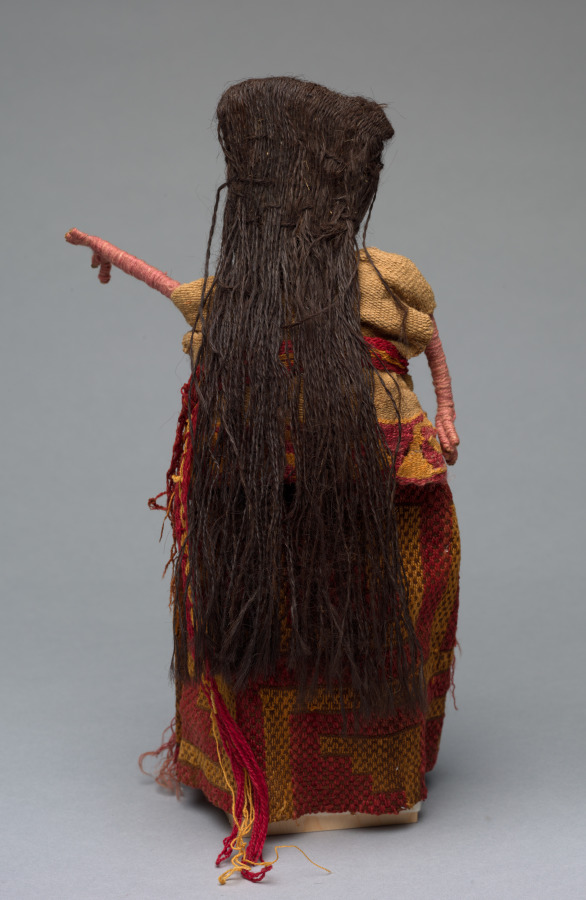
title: Male Figure with Modern Additions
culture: Peru, Central Coast, Chancay people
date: 1100–1500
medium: Original elements include the head and tunic; added elements include the skirt, red fringe, and belt; Cotton, camelid fiber, reeds; Slit tapestry (tunic and face); plain weave with supplementary weft (skirt)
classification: Miscellaneous